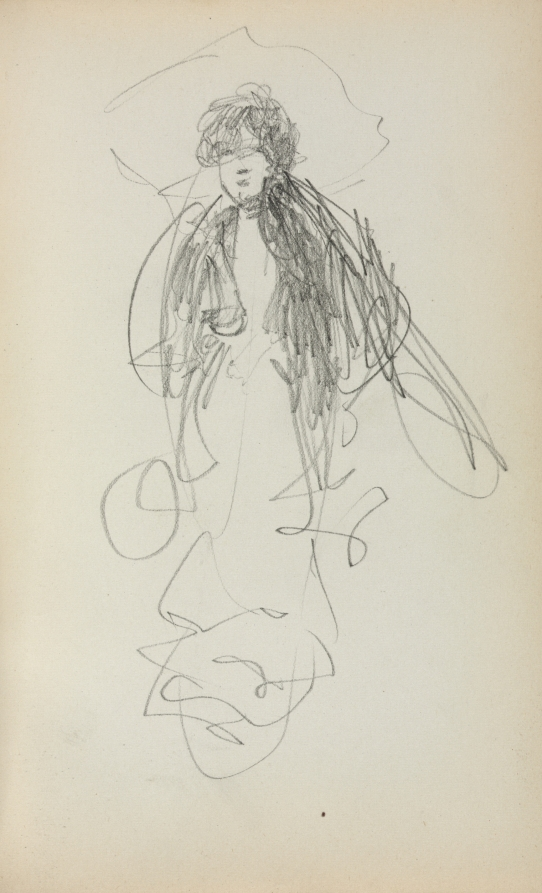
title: Italian Sketchbook: Standing Woman (page 219)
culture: America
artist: Maurice Prendergast (American, born Newfoundland [now Canada], 1858–1924)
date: 1898–1899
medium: pencil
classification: Bound Volume